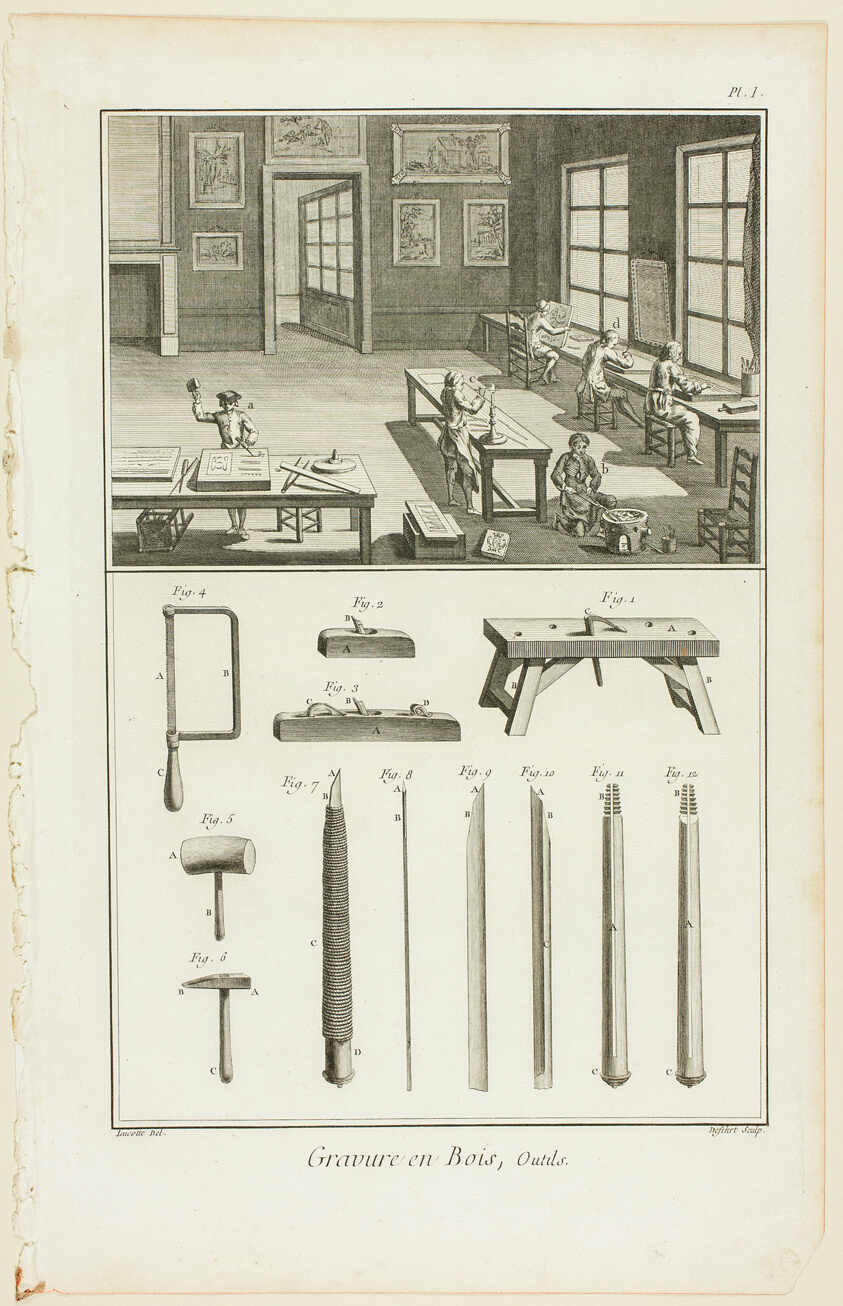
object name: Print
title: Wood Engraving, Tools, from Encyclopédie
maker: A. J. Defehrt (French, active 18th century); after Jacques Raymond Lucotte, (French, active 18th century); published by André le Breton (French, 1708-1779), Michel-Antoine David (French, c. 1707-1769), Laurent Durand (French, 1712-1763), and Antoine-Claude Briasson (French, 1700-1775)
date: 1762/77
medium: Engraving on cream laid paper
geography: France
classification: etching; print; prints and drawing